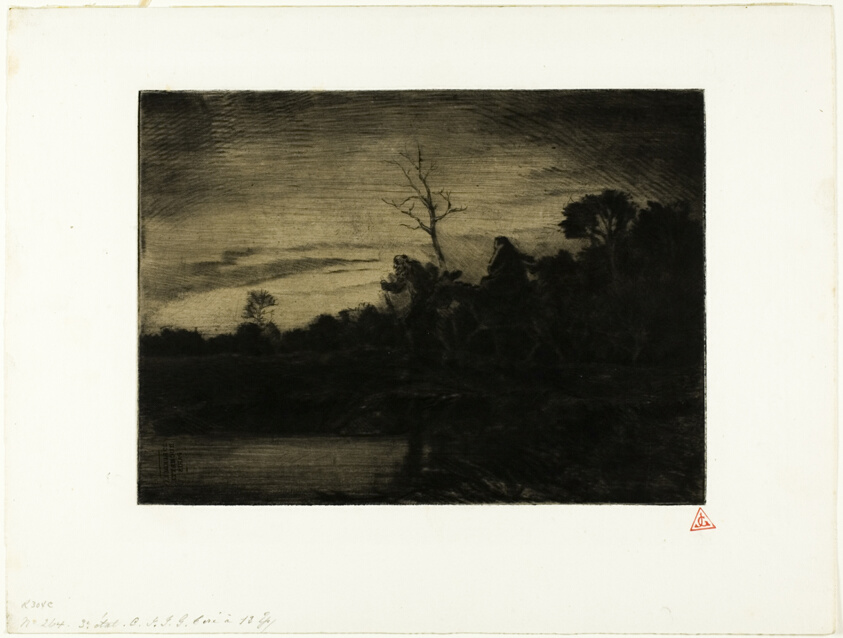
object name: Print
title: The Flight into Egypt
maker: Charles Émile Jacque (French, 1813-1894)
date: 1848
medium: Drypoint and roulette on ivory wove paper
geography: France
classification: etching; print; prints and drawing